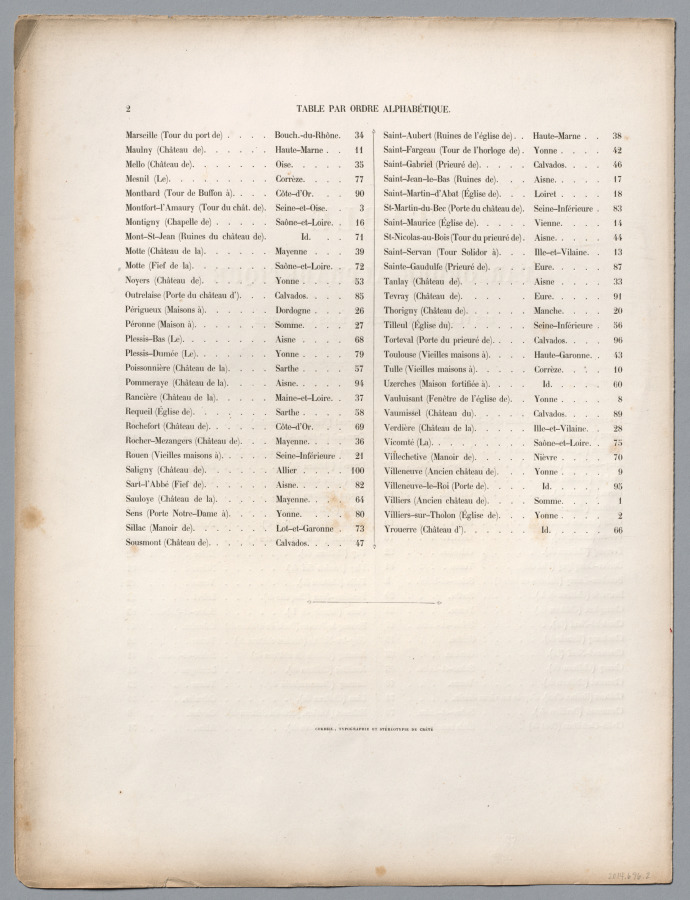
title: Architecture Pittoresque ou Monuments des xveme. Et xvieme. Siecles: Chateaux De France des XV et XVI Siecles: Title Page and Table of Contents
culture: France, 19th century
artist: Victor Petit (French, 1817–1874)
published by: Charles Boivin (publisher and editor); Lith de Godard a Paris (printer)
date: published 1860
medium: lithograph with tint stone, from portfolio of 100 lithographs with tint stone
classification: Portfolio